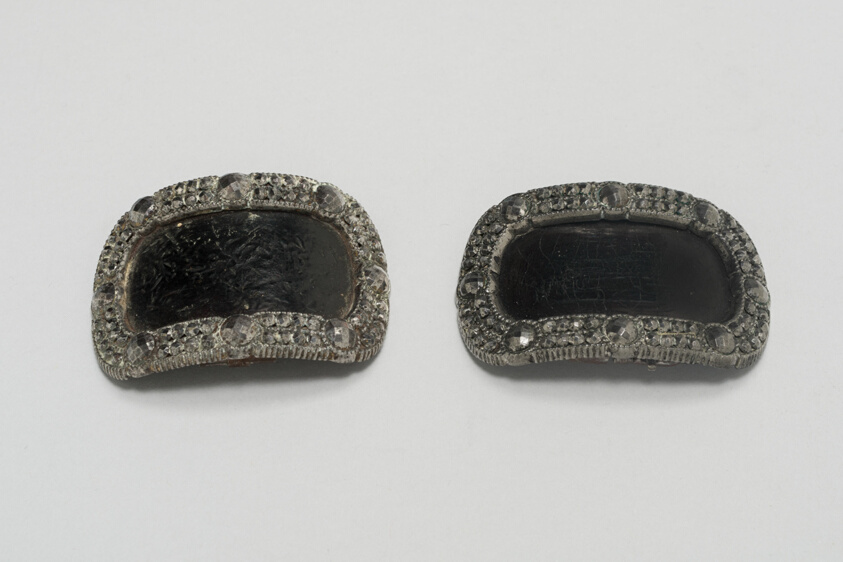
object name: Metalwork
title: Pair of Shoe Buckles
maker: London, England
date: Last quarter 18th century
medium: Cut steel, leather, and iron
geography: England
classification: buckle (strap accessory); jewelry; costume accessory; european decorative arts; metalwork